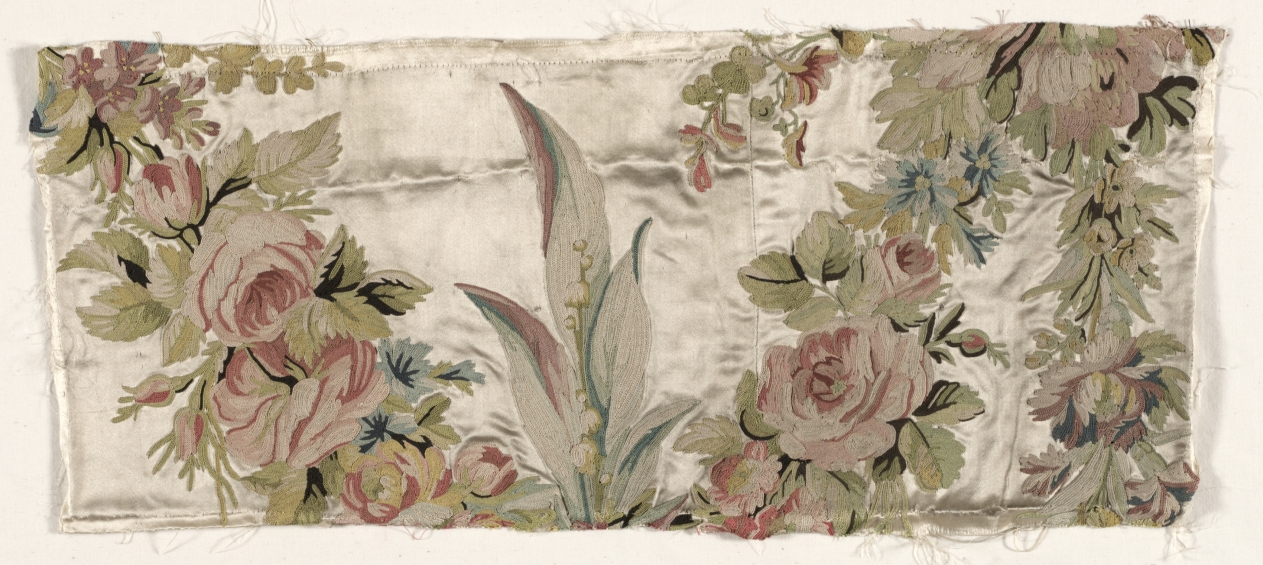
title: Coverlet Fragment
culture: France, 18th Century, period of Louis XVI (1774-1793)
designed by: Philippe de Lasalle (French, 1723–1805)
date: c. 1760–1770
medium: embroidered satin and silk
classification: Textile